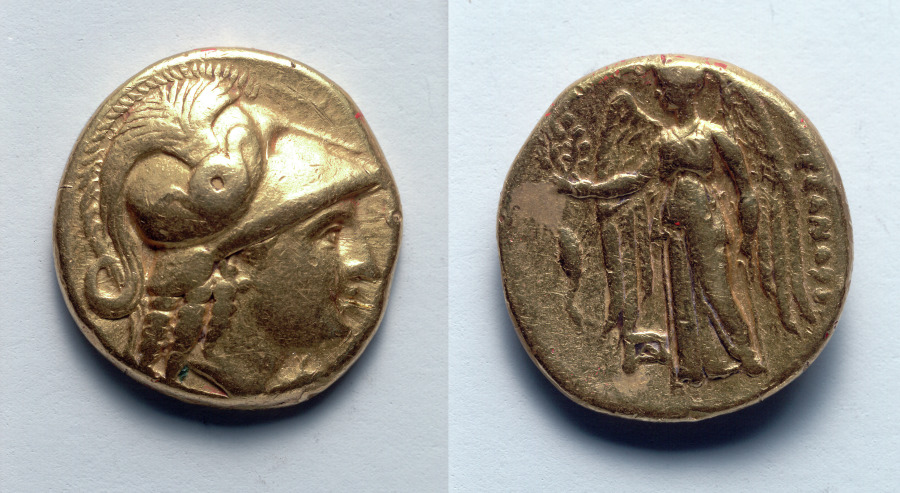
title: Stater: Head of Athena (obverse); Nike (reverse)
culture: Greek, Macedonian, minted at Abydos (Egypt), reign of Alexander III [The Great}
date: 336–323 BCE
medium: gold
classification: Coins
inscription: [ΑΛ]ΕΞΑΝΔΡΟ[Υ]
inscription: Δ within Π